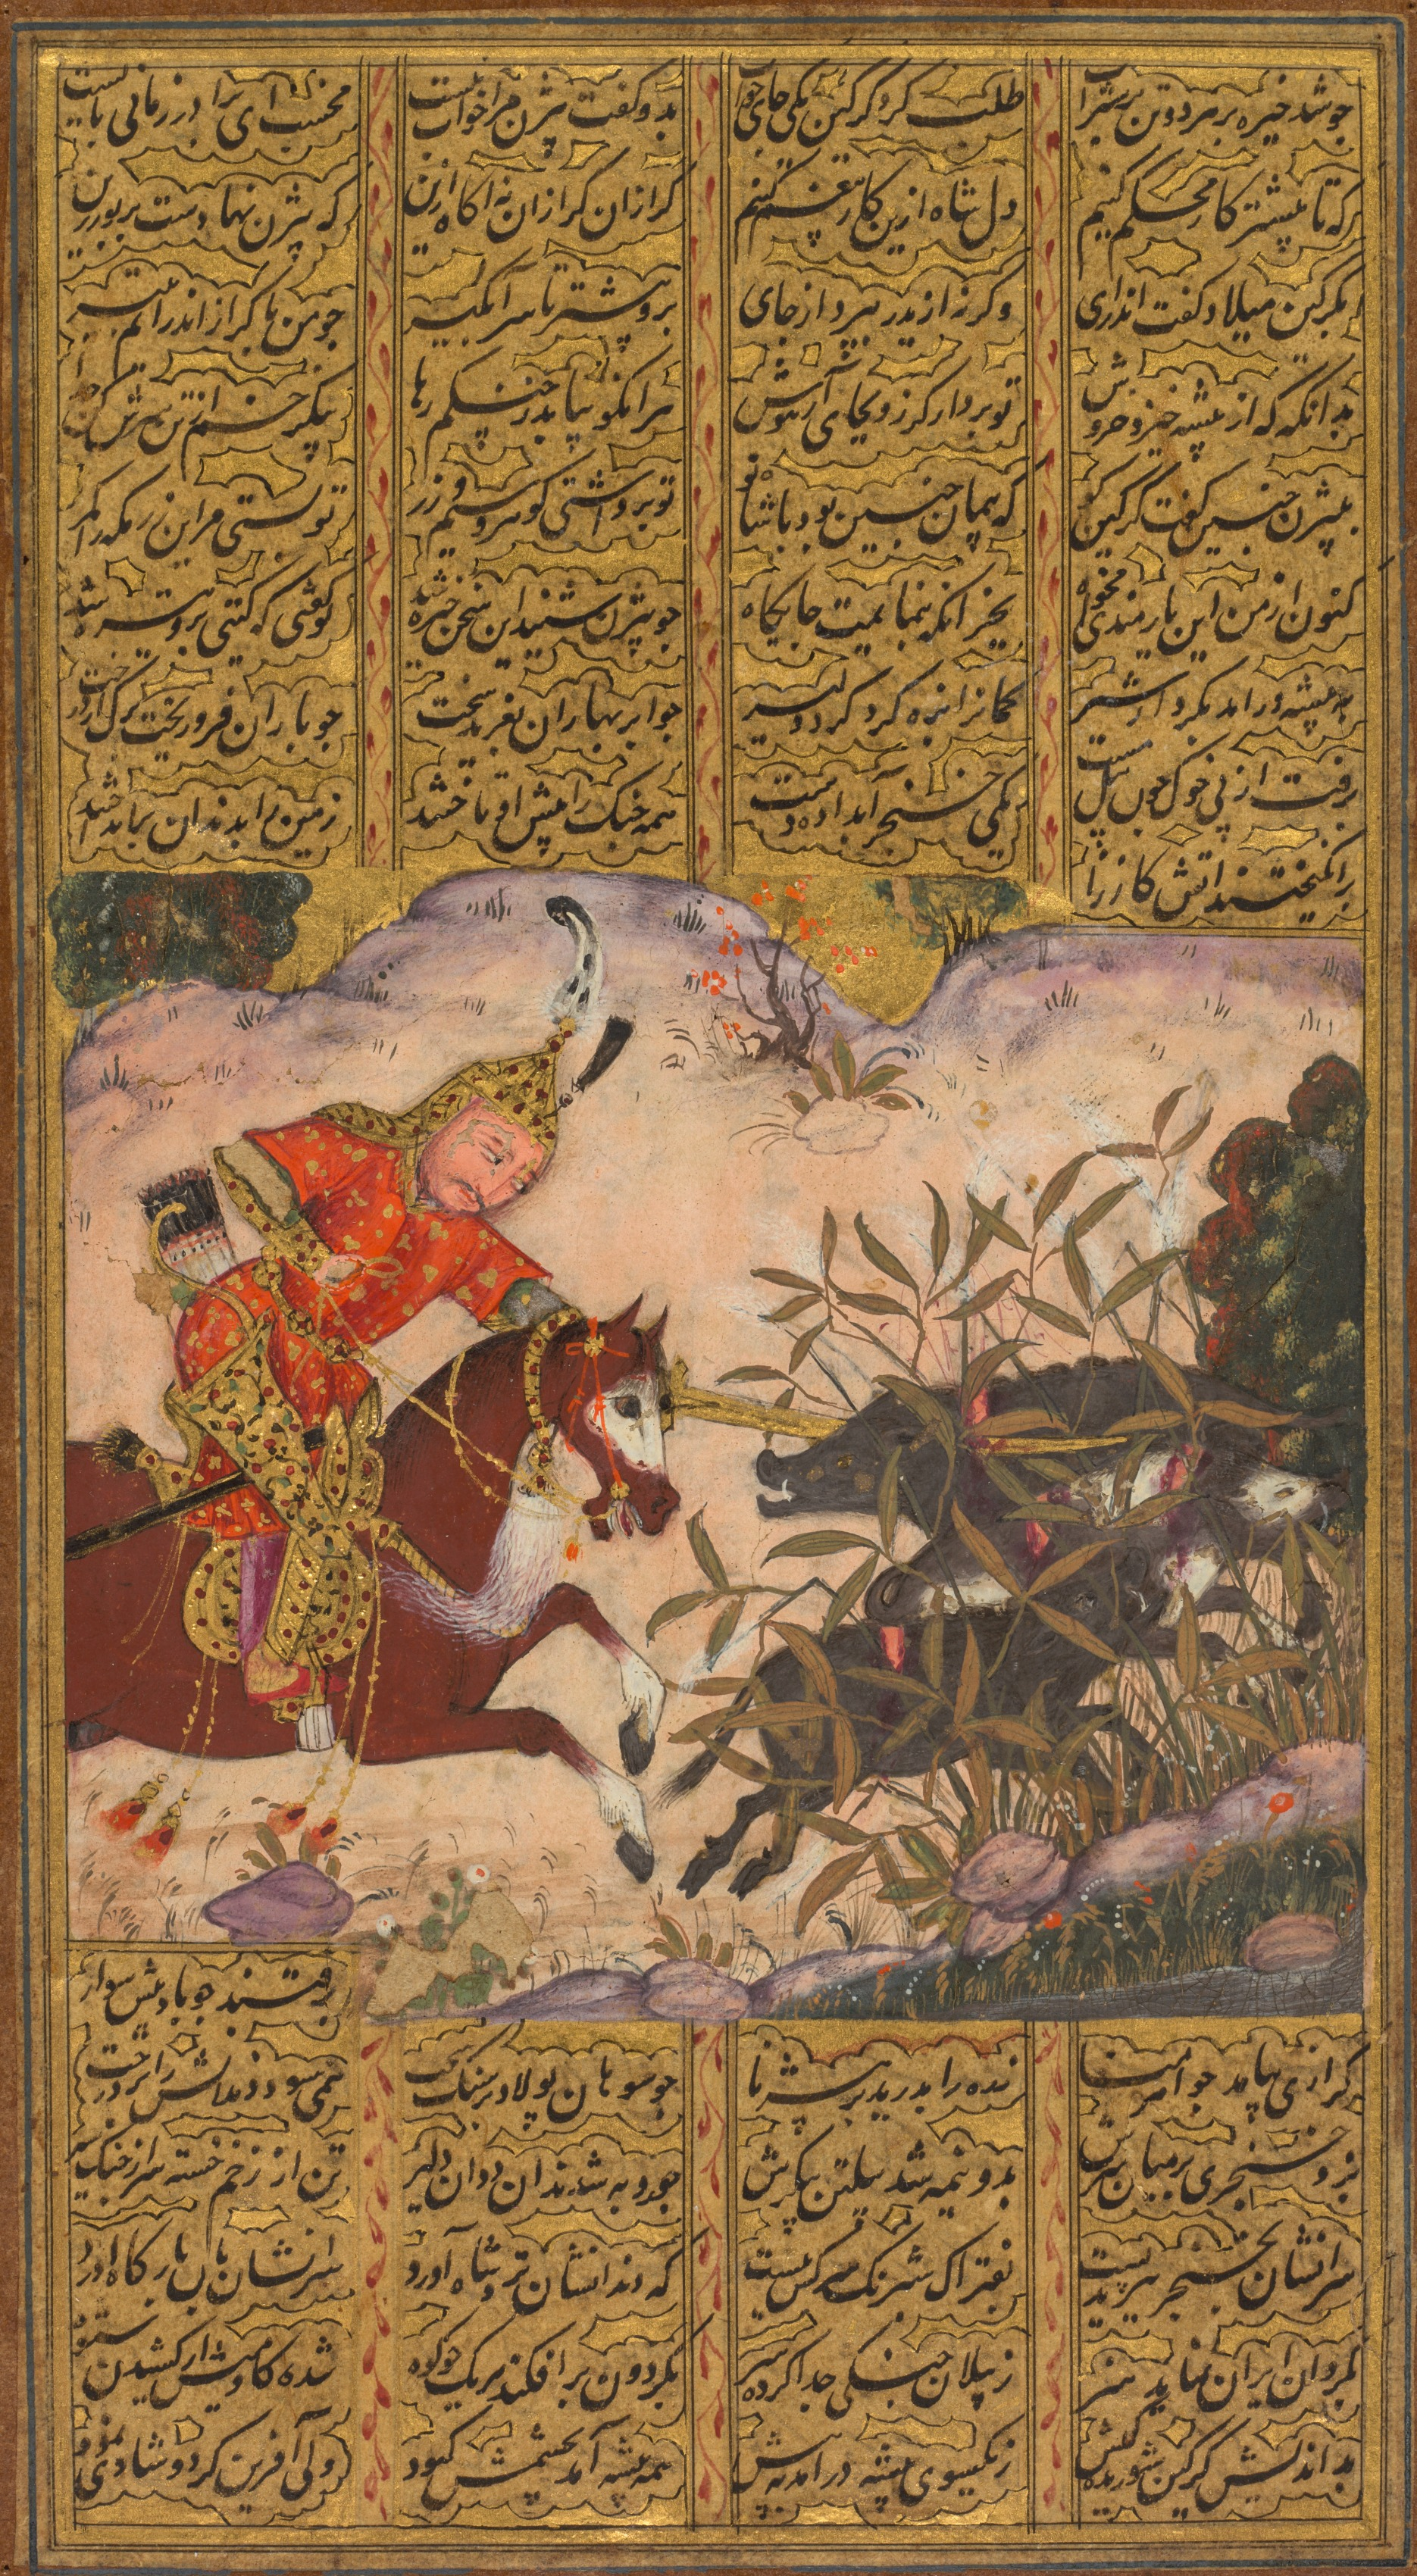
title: Bijan killing the wild boars of Irman, from a Shah-nama (Book of Kings) of Firdausi (Persian, about 934–1020), (recto)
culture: India, Bijapur, Deccan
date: c. 1610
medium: Gum tempera, ink, and gold on paper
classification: Painting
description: This illustrated page from a Shah-nama depicts the first adventure of the hero Bijan, son of an Iranian knight. When reports arrived at the king’s court of wild boars ravaging the borderlands between the enemy realms of Iran and Turan, Bijan volunteered to hunt and kill the beasts, much to the chagrin of his father, who doubted his young son’s ability to navigate the politically volatile situation. The fearless Bijan is shown on horseback as he singlehandedly strikes down on the bodies of the wild boars in the brush. After overzealously celebrating his success, Bijan must be rescued from a pit by Rustam. This early manuscript from the Deccan made for the sultan of Bijapur is characterized by glowing colors and lavish use of gold.